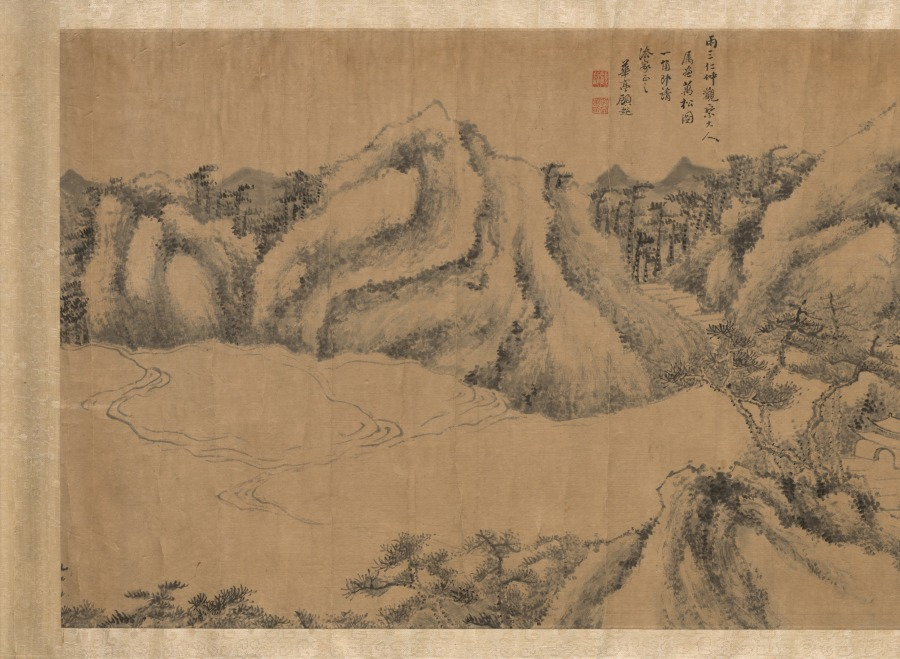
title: Pine-shaded Monastery on a Cloudy Mountain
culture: China, Qing dynasty (1644-1911)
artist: Gu Chao (Chinese, active late 1700s)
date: late 1700s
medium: handscroll, ink and slight color on paper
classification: Painting